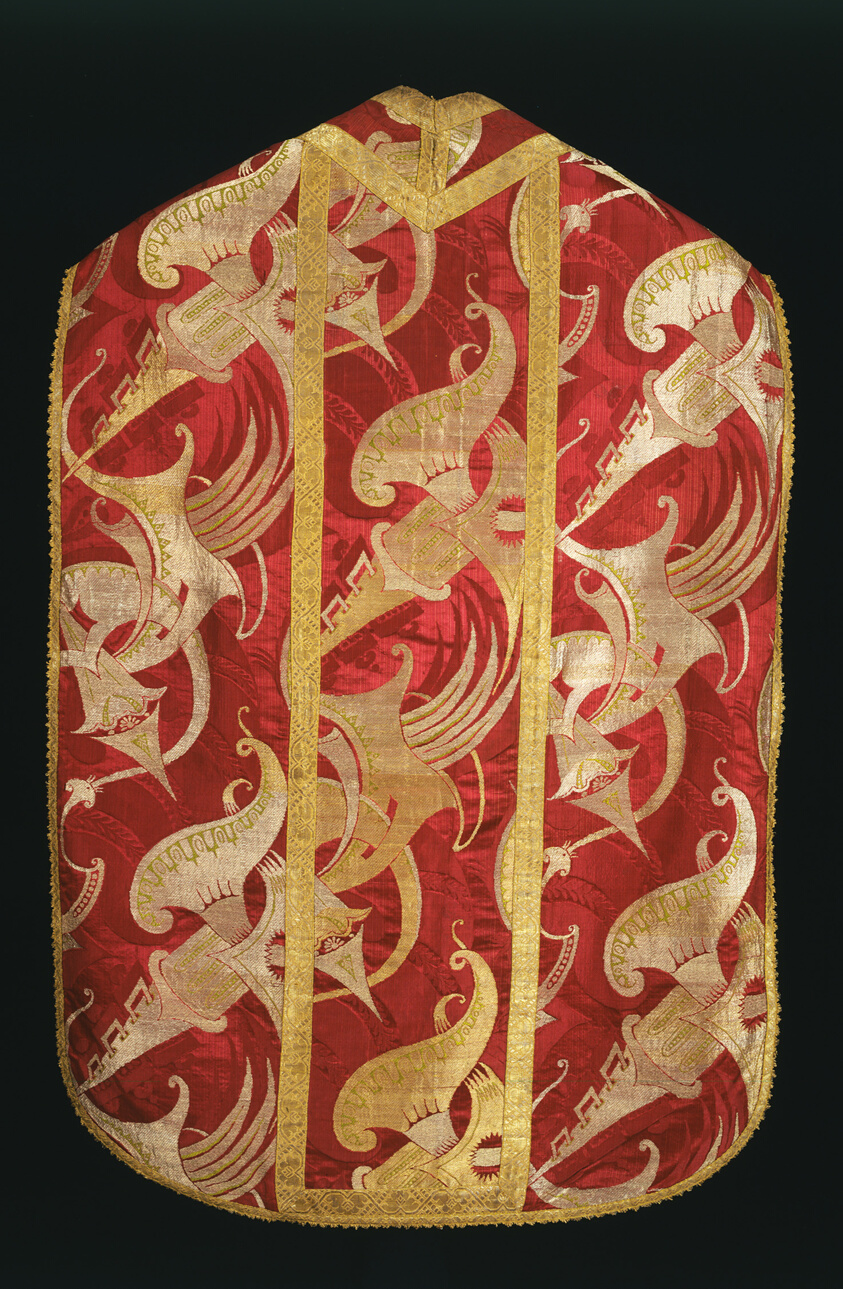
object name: Textile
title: Chasuble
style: "bizarre" style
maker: France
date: 1700/25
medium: Silk and gilt-metal-strip-wrapped silk, satin damask weave with brocading wefts; edged with woven tape and fringe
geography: France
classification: textile; weaving; liturgical; costume